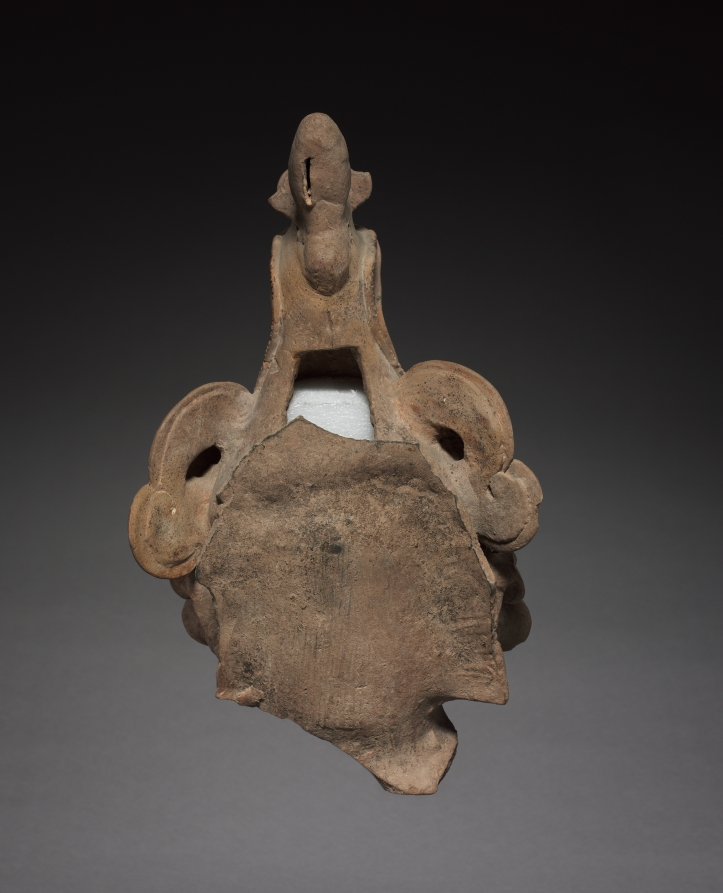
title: Head with Animal Helmet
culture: Mexico, Gulf Coast, San Andrés Tuxtla(?)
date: c. 600–1000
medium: earthenware, pigment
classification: Sculpture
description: The Gulf Coast of Mexico was an important center of ceramic sculpture production for more than 2,000 years. Nearly life-size hollow effigies, produced after about AD 600, are among the most spectacular works from this region. Although the faces were sometimes made with molds, this example appears to be hand-modeled. The mythical serpent helmet indicates that the figure may be a ritual performer.